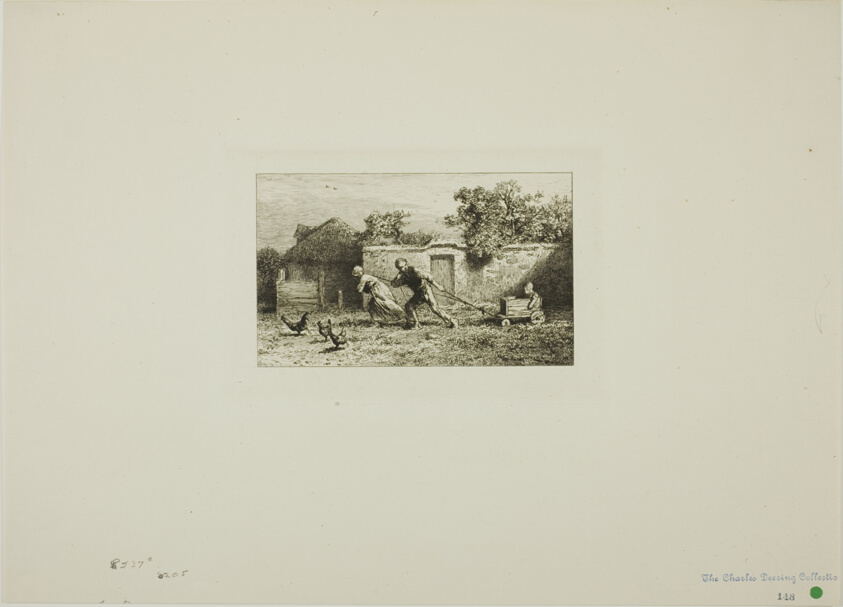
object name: Print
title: The Carriage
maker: Charles Émile Jacque (French, 1813-1894)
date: 1865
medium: Etching, engraving and roulette on ivory laid paper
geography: France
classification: etching; print; prints and drawing